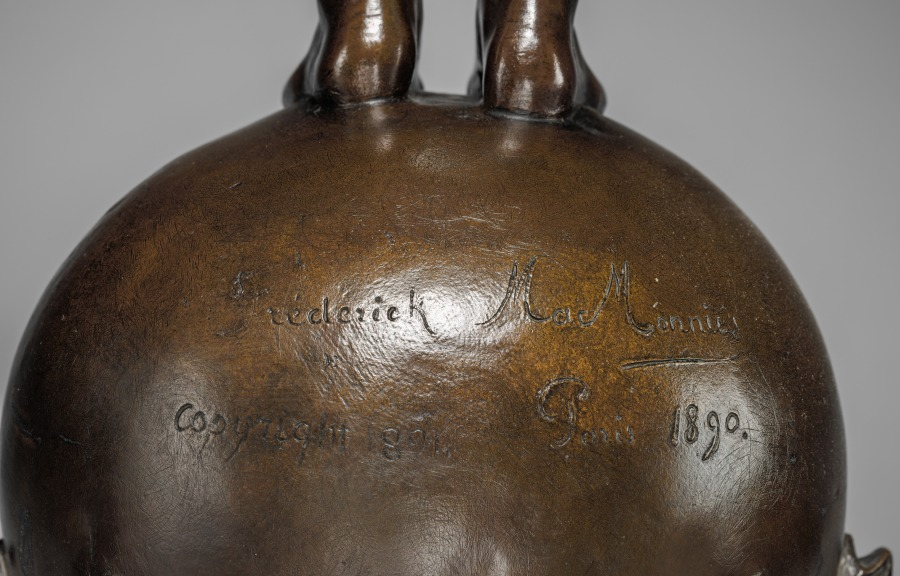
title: Pan of Rohallion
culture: America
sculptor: Frederick William MacMonnies (American, 1863–1937)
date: 1890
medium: bronze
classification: Sculpture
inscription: Signed on globe: Frederick MacMonnies, Paris 1890. © 1894. Inscribed around base: TO PAN OF ROHALLION ANNO DOMINI MDCCCLXL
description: Rohallion in the title refers to the name of an estate in New Jersey, whose owner commissioned MacMonnies to create a large fountain of this design for a garden pool. Later, the artist made several smaller versions, such as this example. Here, the ancient Greek god Pan plays his musical pipes while standing on an orb supported by fish.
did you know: The character of Peter Pan, including his flute playing, references the Greek god Pan.